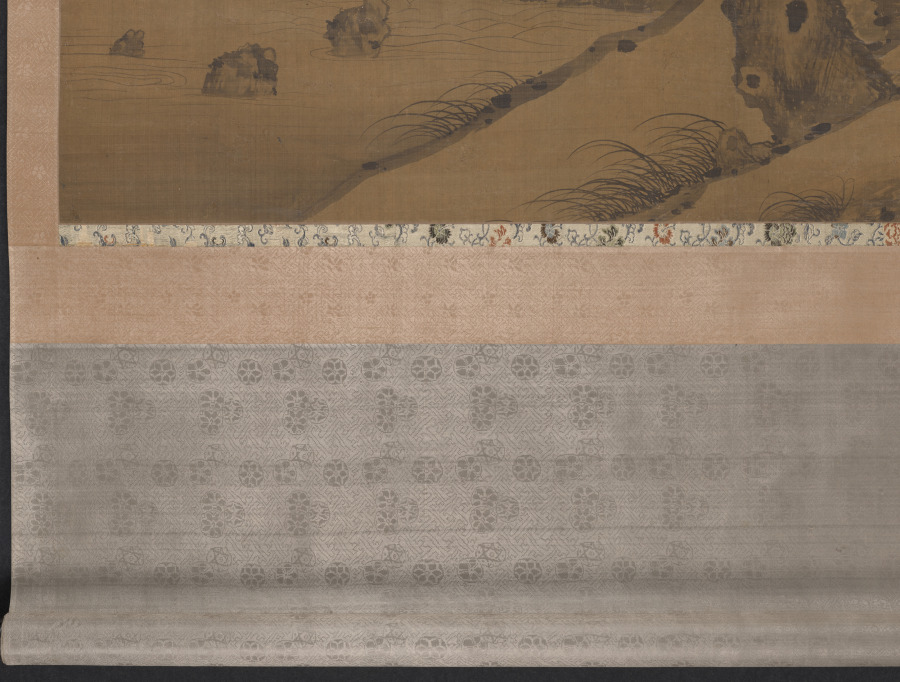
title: Old Trees by a Cool Spring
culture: China, Yuan dynasty (1271-1368)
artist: Li Shixing (Chinese, 1283–1328)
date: 1326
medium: hanging scroll; ink on silk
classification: Painting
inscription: 泰定丙寅年冬十二月薊丘李士行遵道作。[印] 李士行印; 李氏遵道; 遊戲翰墨.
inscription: 薊丘李侯能畫松，蟠根錯節騰蛟龍。 枯梢削鐵歲月古，細葉當風紫翠重。 昔人曾入子固夢，此株豈為秦官封。 畢宏韋偃偕已矣，請公放筆吾將從。 華溪九十翁沈夢麟書 蘊中上人題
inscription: [印] 明善堂所見書畫印記; [印] 怡親王寶